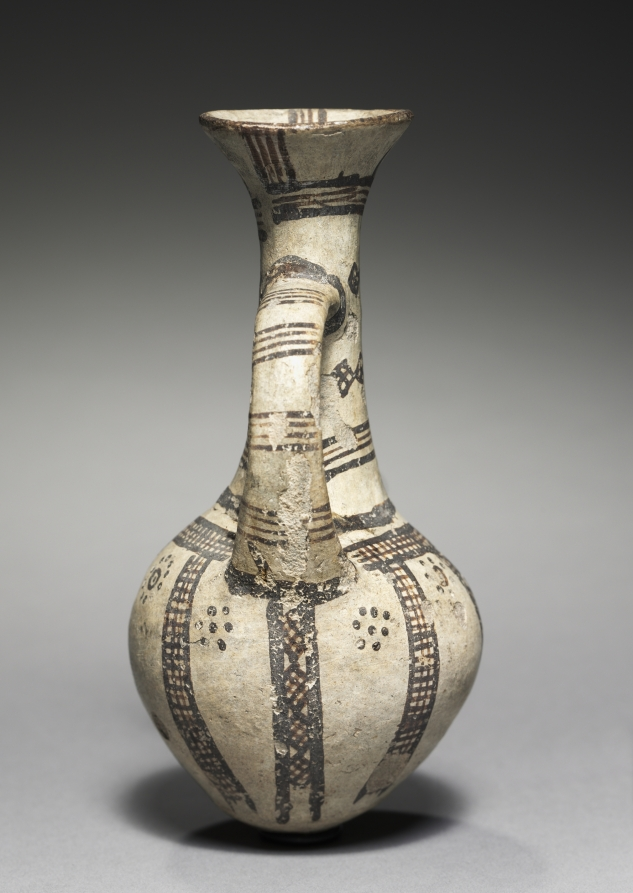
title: Jug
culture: Cyprus, late Cypriot II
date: c. 1450–1200 BCE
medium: white slip ware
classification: Ceramic